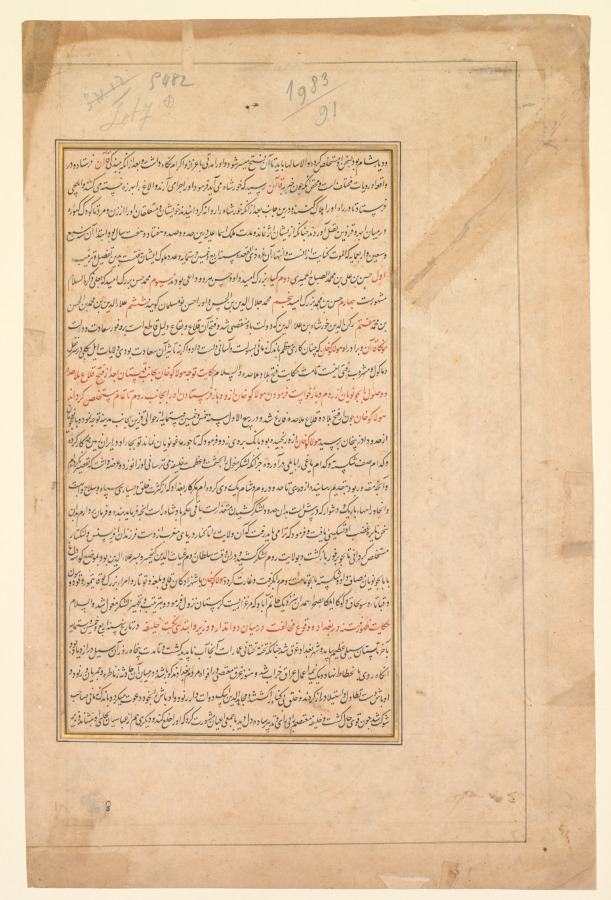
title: Hulagu Khan giving a feast and dispensing favor upon the amirs and princes, from a Chingiz-nama (Book of Chingiz Khan) of the Jami al-tavarikh (Compendium of Chronicles)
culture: Mughal India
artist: Lal (Indian, active c. 1555–1600)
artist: Dharam Das (Indian, active c. 1580–1605)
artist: Padarath (Indian, active late 1500s)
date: c. 1596–1600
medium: Gum tempera, ink, and gold on paper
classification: Painting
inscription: inscription at the base of the painting: tarih Lal 'amal-i Dharam Das tuze name cherehe Padarath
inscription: Persian inscription in top margin, in nasta‘liq script: Hulagu Khan giving a feast and dispensing favor upon the amirs and princes Persian inscription in bottom margin, in nasta‘liq script: Outline drawing by Lal, [color] work by Dharam Das, important portraits by Padarath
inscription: Verso: Text of Hulagu Khan giving a feast and dispensing favor upon the amirs and princes Persian text in nasta‘liq script: [cont. from recto] in the Land of Sham [Syria], [that] would surrender if he [Khurshah] gave the word; otherwise, it would have taken years before they could be overrun. So he [Hulagu] kept him for a while, and he was treated with respect and dignity. And then he dispatched him to the service of the Great Khan [Mongke]. And regarding his [Khurshah’s] death, there are different versions. The truth is that when news reached the Great Khan that Khurshah was on his way, he said: “Why are they bringing him [here] and tiring the packhorses to no purpose?” And he [Mongke] dispatched envoys who did away with him en route. And at this end, after Khurshah had been sent off on the road, they murdered his entire family and household on the road between Abhar and Qazvin, including men, women, and infants still in their cradles, so that not a trace of them was left. And the duration of the rule of the Ismailis in these regions is around one hundred and seventy-seven years, starting from the year four hundred and seventy-seven [AD 1084], and the word “Alamut” is its chronogram. It ended on the first of Dh’ul Qa’da 654 [20 November 1256]. And the number of their rulers is seven, in this manner and sequence: first, Hasan son of Ali son of Muhammad al-Sabbah al-Hamayri; second, Kiya Buzug Ummid, and he and Hasan [the first ruler listed] were both Ismaili missionaries; third, Muhammad Hasan Buzurg Ummid, who is known as ‘Ala dhhkirhi’l-Salam; fourth, Hasan son of Muhammad Buzurg Ummid; fifth, Muhammad Jalal al-Din son of Hasan and they call him Hasan the New Musulman; sixth, ‘Ala al-Din son of Muhammad son of al-Hasan son of Muhammad; seventh, Rukn al-Din Khurshah son of ‘Ala al-Din, in whose time the dynasty fell. And the conquest of those fortresses and edifices is finite proof of the plenitude of the good fortune of Mongke Khan and his brother Hulagu Khan, who managed to accomplish such a momentous task in such a short span of time with such ease and facility; for had it not been for that good fortune, the conquered domains would have been ruined, faced with the difficulties of providing and transporting provisions and drink. These are the events and accounts of the conquest of the lands of the Ismaili heretics, as mentioned above. Finis. The narrative of Hulagu Khan turning toward Kohistan after the capture of the heretics’ fortresses and receiving Bayju Noyan from Anatolia and his interrogation by Hulagu Khan and his dispatch again to Anatolia to complete the conquest Hulagu Khan, when he had completed the conquest of the citadels and lands of the [Ismaili] heretics, in Rabi‘ al-awwal of the year 655 [AD 1257] from the region of Qazvin, proceeded toward Hamadan. And Bayju Noyan arrived from the direction of Azerbaijan. Hulagu Khan was upset with him and shouted at him saying, “Since the passing of Churmaghun Noyan, what have you done in the Land of Iran, and which army have you defeated, and which rebel have you managed to bring into obedience, aside from instilling fear into the Mongol army with accounts of the caliph’s might and grandeur?” He [Bayju] knelt down and said: “I committed no wrong, but did what I could as presented to you. I have subjugated the land from the gates of Rayy to the borders of Anatolia and Syria, all save the matter of Baghdad. It is difficult to take the army there given the difficult roads ahead, the heavy population, and their vast army and arms. It is for the mighty ruler [padshah] to decide and I will obey whatever he decrees.” These words alleviated his [Hulagu’s] anger and he decreed thus: “You must go and conquer lands as far as the shores of the western sea from the hands of the sons of Efrins and Lanktar.” Bayju returned at once and took an army to Anatolia; and at that time the sultan of Anatolia, Ghiyath al-Din Kai-Khusrau son of ‘Ala al-Din, met Bayju Noyan in battle at Kusa Dagh and was defeated. And Bayju conquered the whole of Anatolia and indulged in plunder. And Hulagu Khan accompanied by princes Ghuli and Balagha and Tutar and chief commanders Buqa Timur and Qudusun and Qata and Sunjaq and Kuka Ilgai, camped in the Hamadan plain near Hatimabad, which is a meadow with tamarisk trees, and began to prepare and arrange the troops. Finis. The emergence of tumult in Baghdad and the discord between the chief secretary and the vizier and the beginning of the caliph of Baghdad’s demise In the year 654 [AD 1256] at the end of the summer, a great flood came down and inundated the city of Baghdad in such a way that the lower part of the buildings there were submerged in water and disappeared, and for fifty days the flood was on the rise, and then it began to subside, and half of the habitations in Iraq were destroyed, and to date the Musta‘sami Flood is remembered as a byword [for a damaging flood] among the people of Baghdad. And in the midst of this catastrophic event, the rabble, ruffians, and misfits embarked on looting and gained the upper hand and every day killed a lot of people. And Mujahid al-Din Aybek, the chief secretary, gathered the rabble and the misfits around himself and in a short space of time built up a power base, and when he felt empowered and saw that Caliph Musta‘sam was indecisive and naive in judgment, he consulted with some of the notables in order to oust him from his position and place another Abbasid in his place, and vizier . . .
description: Seated on a lapis-blue floral carpet is Chingiz (Genghis) Khan’s grandson, who ruled Iran from 1256 to 1265. This painting is from an illustrated copy of the history of Chingiz Khan and his family that the Mughal emperor Akbar commissioned toward the end of the latter’s life. Mughal is the Persian word for Mongol, and Akbar traced direct genealogical descent from Chingiz Khan on his mother’s side. The nomadic Mongols created court settings using portable platforms and elegant carpets and tents. Multilevel canopies of imperial crimson mark the position of the khan, which means “ruler” in Mongolian.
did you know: Mongol rulers were identified by the five-feathered crown.